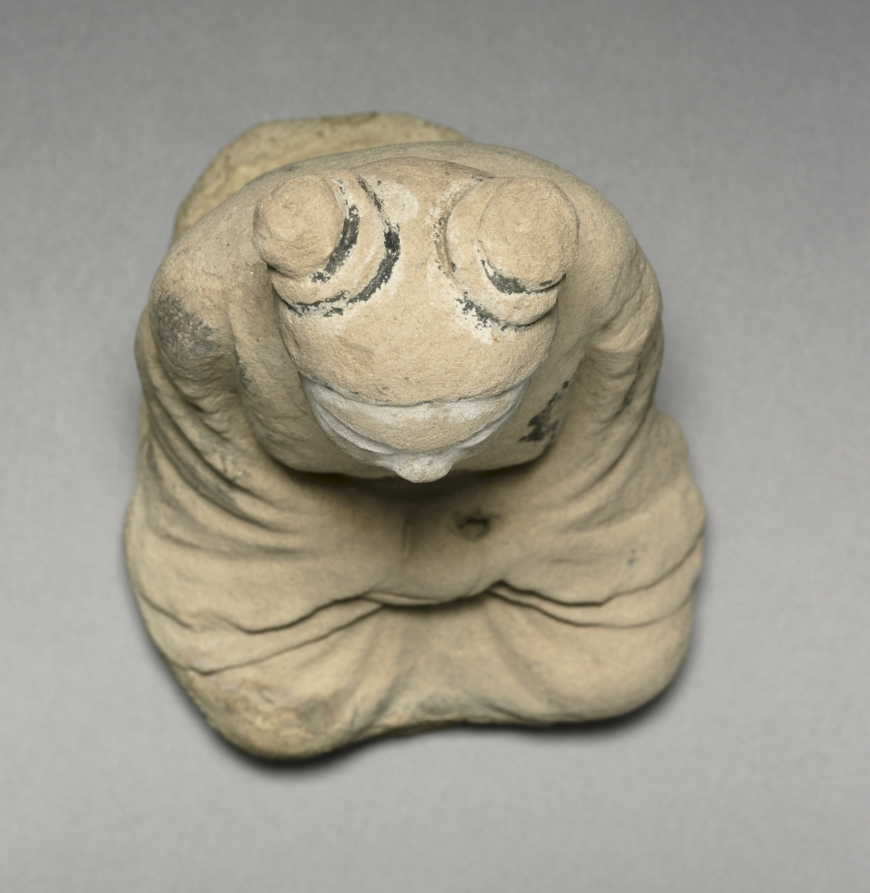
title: Woman from an Audience Scene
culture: Japan, Asuka period (538-710) to Nara period (710-94)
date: mid-600s to early 700s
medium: unfired clay with color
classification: Sculpture